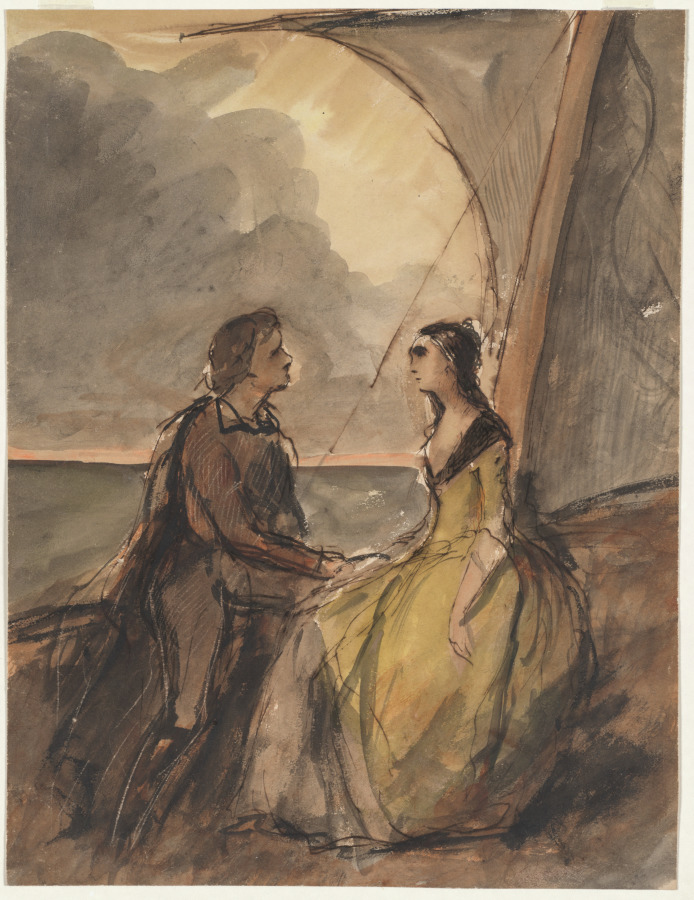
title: Seated Man and Woman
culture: France, 19th century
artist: Célestin François Nanteuil (French, 1813–1873)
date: c. 1830–60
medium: pen and brown ink, watercolor and scoring (recto), pen and brown ink (verso) on medium weight wove paper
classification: Drawing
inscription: On verso, on balloon, in brown ink: “LESCABICATI[?] / par / [?]”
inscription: bottom center, in brown ink: “Les [?] / [?] / La porte au [?] / [?] des [?] / L’argent [?]”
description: This drawing shows Célestin Nanteuil’s accomplishments as both a fine artist and illustrator. On one side, a couple converses, depicted in dense areas of ink—a practice Nanteuil learned from his friend, the author and artist Victor Hugo. Nanteuil scratched into these dark areas to create highlights. The back of the sheet features casually sketched vignettes, probably designed to accompany text in a book.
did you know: Nanteuil was close friends with the writer and artist Victor Hugo, who influenced his work.